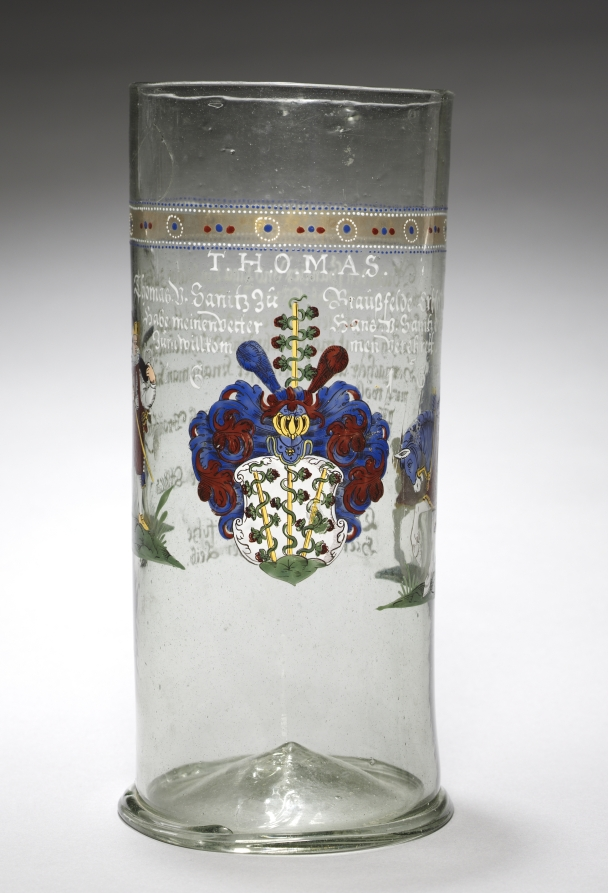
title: Beaker ("Welcome Glass") with Arms and Inscriptions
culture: Germany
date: 1616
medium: enameled glass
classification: Glass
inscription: THOMAS V. SANITZ ZU BRAUSZFELDE ERBSESSENN HABE MEINEN VETTER HANS V. SANITZ DISZ GLASZ ZUM WILLKOMMEN VEREHRETT. (Thomas von Sanitz has given this glass to my cousin, Hans von Sanitz, in welcome.)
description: The inscription tells that this beaker was given by Thomas V. Sanitz zu Brausfelde Erbsessen to welcome his cousin Hans V. Sanitz.